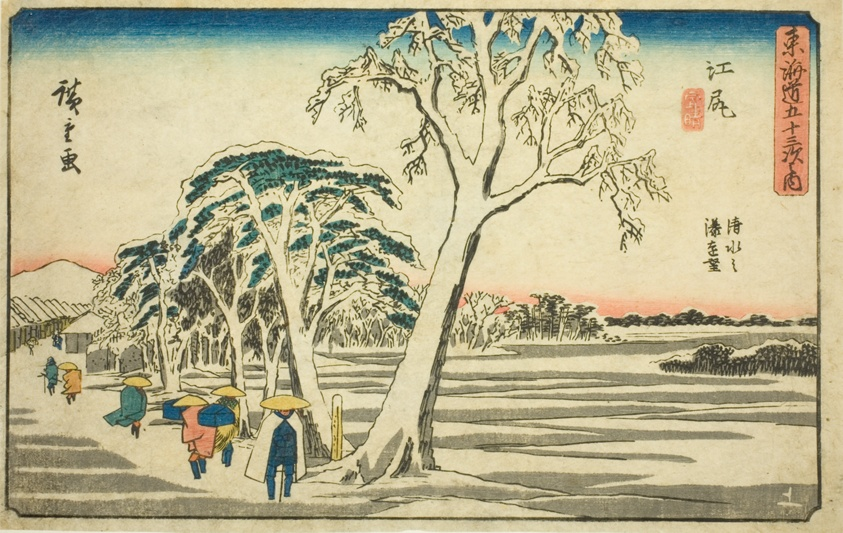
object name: Print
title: Ejiri: Distant View of Shimizu Harbor in Clear Weather after Snow (Ejiri, Shimizu no minato enbo, yukibare), from the series "Fifty-three Stations of the Tokaido (Tokaido gojusan tsugi no uchi)," also known as the Gyosho Tokaido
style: Japanese (culture or style)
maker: Utagawa Hiroshige 歌川 広重; Japanese, 1797-1858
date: c. 1841/44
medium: Color woodblock print; aiban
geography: Japan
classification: woodblock print; print; asian art